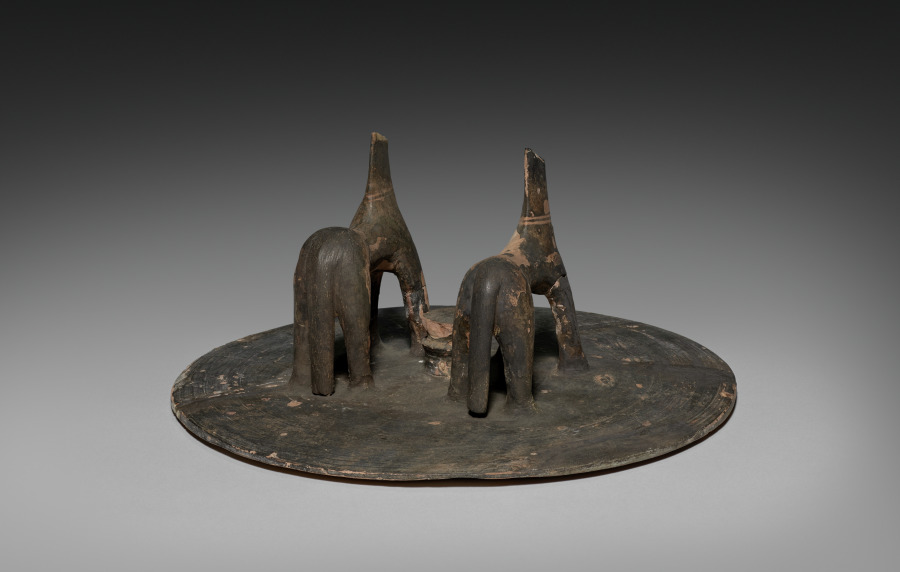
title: Geometric Horse Pyxis (Cylindrical Lid)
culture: Greek, Attic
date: c. 760–750 BCE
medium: ceramic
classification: Ceramic